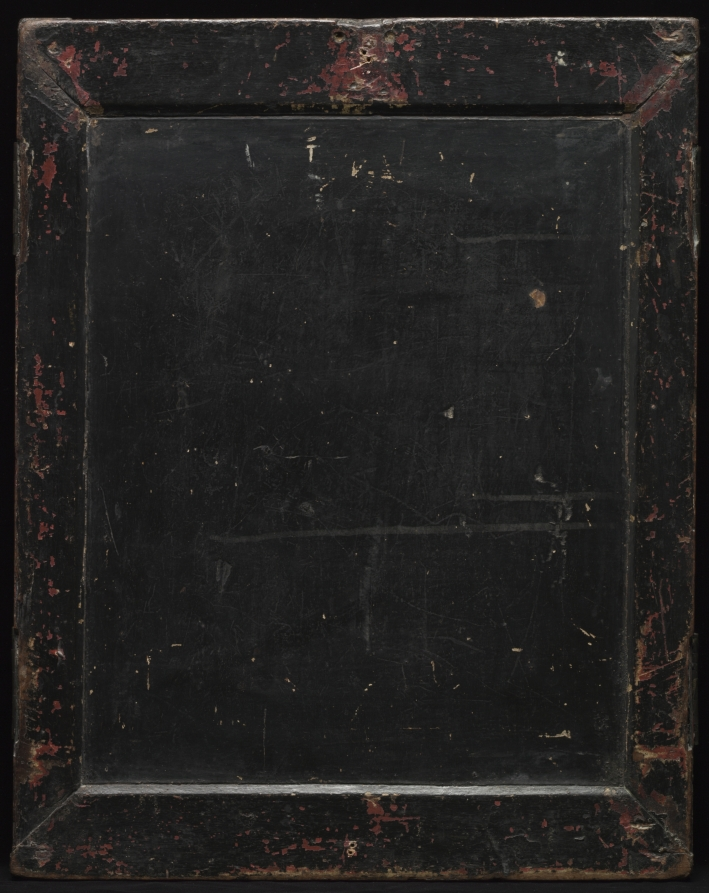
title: Triptych with the Adoration of the Magi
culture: Austria, Salzburg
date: c. 1424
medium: tempera and gold on wood (oak)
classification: Painting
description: This small winged altarpiece, called a triptych, was undoubtedly made for private use. The donor and his wife are shown in the lower central scene kneeling before the Virgin, her mother Saint Anne, and the Christ Child. Above is the Epiphany with the Three Kings presenting gifts to a tightly swaddled Christ.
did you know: On the outer wings moving clockwise are Saints Peter and Paul, Saints Christopher and Erasmus, Saint Barbara and a holy nun, and Saints George and James Major.